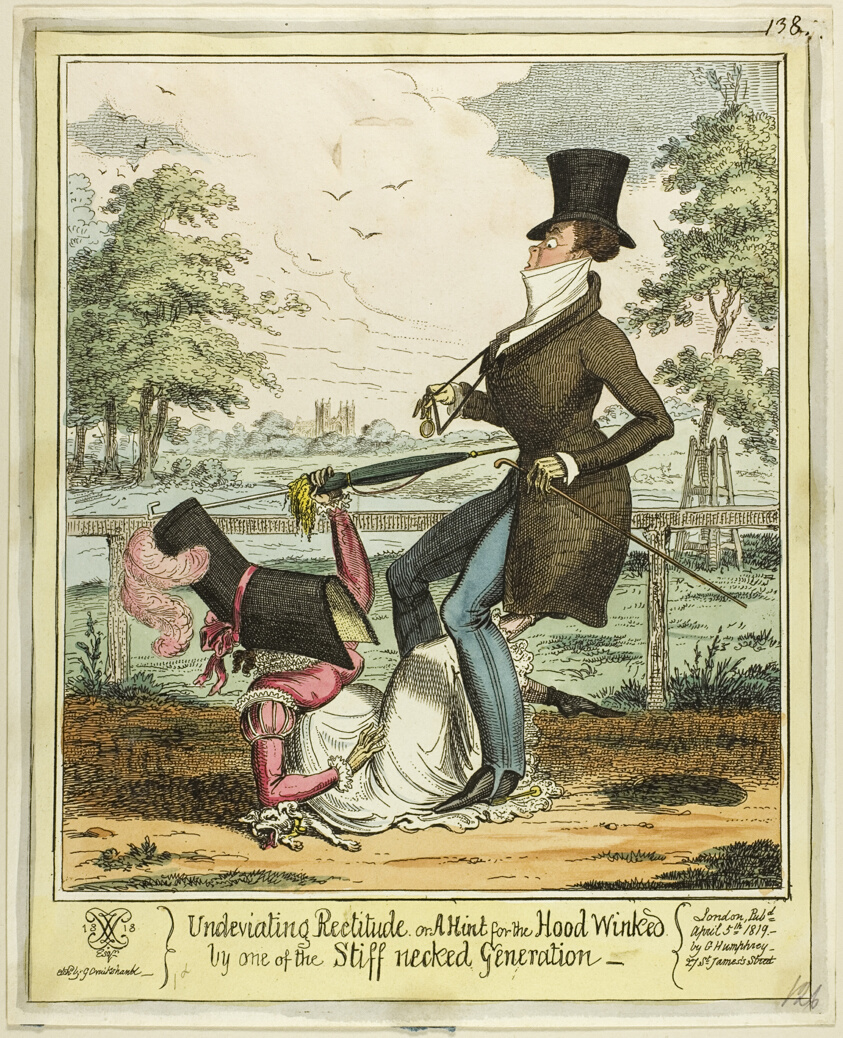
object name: Print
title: Undeviating Rectitude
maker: George Cruikshank (English, 1792-1878); after Monogrammist XX (English, active 1817-1831); published by George Humphrey (English, 1773-1831)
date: published April 5, 1819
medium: Hand-colored etching on paper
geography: England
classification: etching; print; prints and drawing